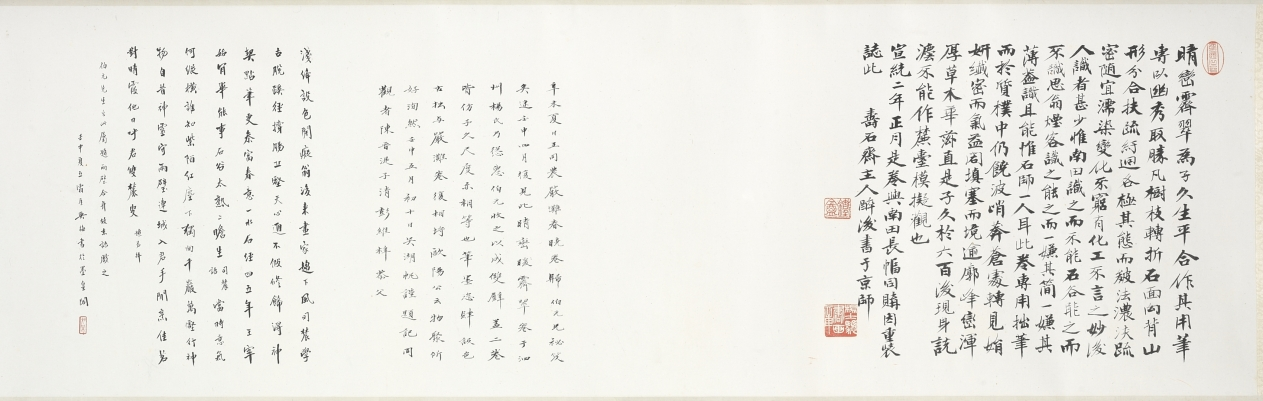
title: Green Peaks under Clear Sky: After Huang Gongwang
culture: China, Qing dynasty (1644-1911)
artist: Wang Yuanqi (Chinese, 1642–1715)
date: 1703–8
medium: handscroll; ink and light color on paper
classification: Painting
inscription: 晴巒霽翠：倣黃子久。麓臺。[印]石師道人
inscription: [印] 御書畫圖留與人看. 子久畫於宋諸大家荊、關、李、范、董、巨，無所不有。運筆不假修飾。皴法由淡入濃，化諸家之迹者也。澹明徐君偶見縮本，臨摹六幅。囑余參以富春大意，成一長卷。余夙夜在公，乘暇偶一點染。至戊子九秋告竣，閱四、五年矣。昔大癡為無用師作富春卷，七年而成，為千古鉅觀。今拙筆癡鈍。亦淹留至此。可為識者噴飯矣。王原祁題。[印]王原祁印; 麓臺 [印, 畫芯左下] 西廬後人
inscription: 3 additional colophons and 15 additional seals: 1 colophon and 9 seals of Yang Shicong 楊士驄 (b. 1870); 1 colophon of Wu Hufan 吳湖帆 (1894–1968); 1 colophon and 1 seal of Wu Mei (20th c.); 5 seals of Cheng Qi 程琦 (1911–1988).